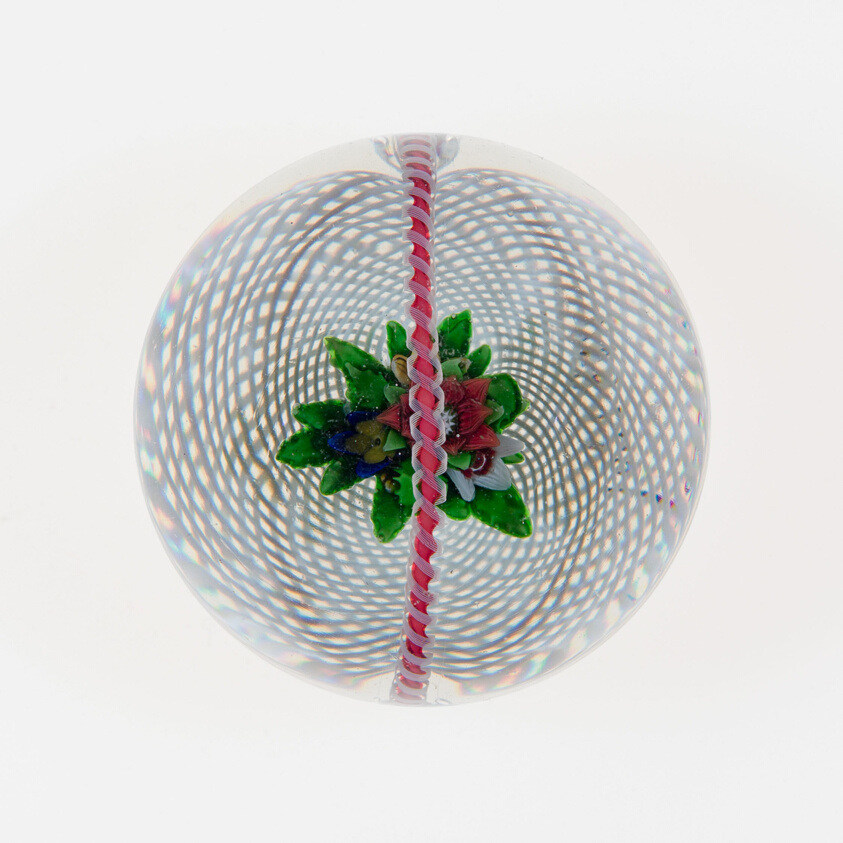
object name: Glass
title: Paperweight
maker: Saint-Louis Glassworks (Cristalleries de Saint-Louis); Lorraine, France, founded 1586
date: c. 1848–55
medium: Glass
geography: Saint-Louis-lès-Bitche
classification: paperweight; lampwork; european decorative arts; glass